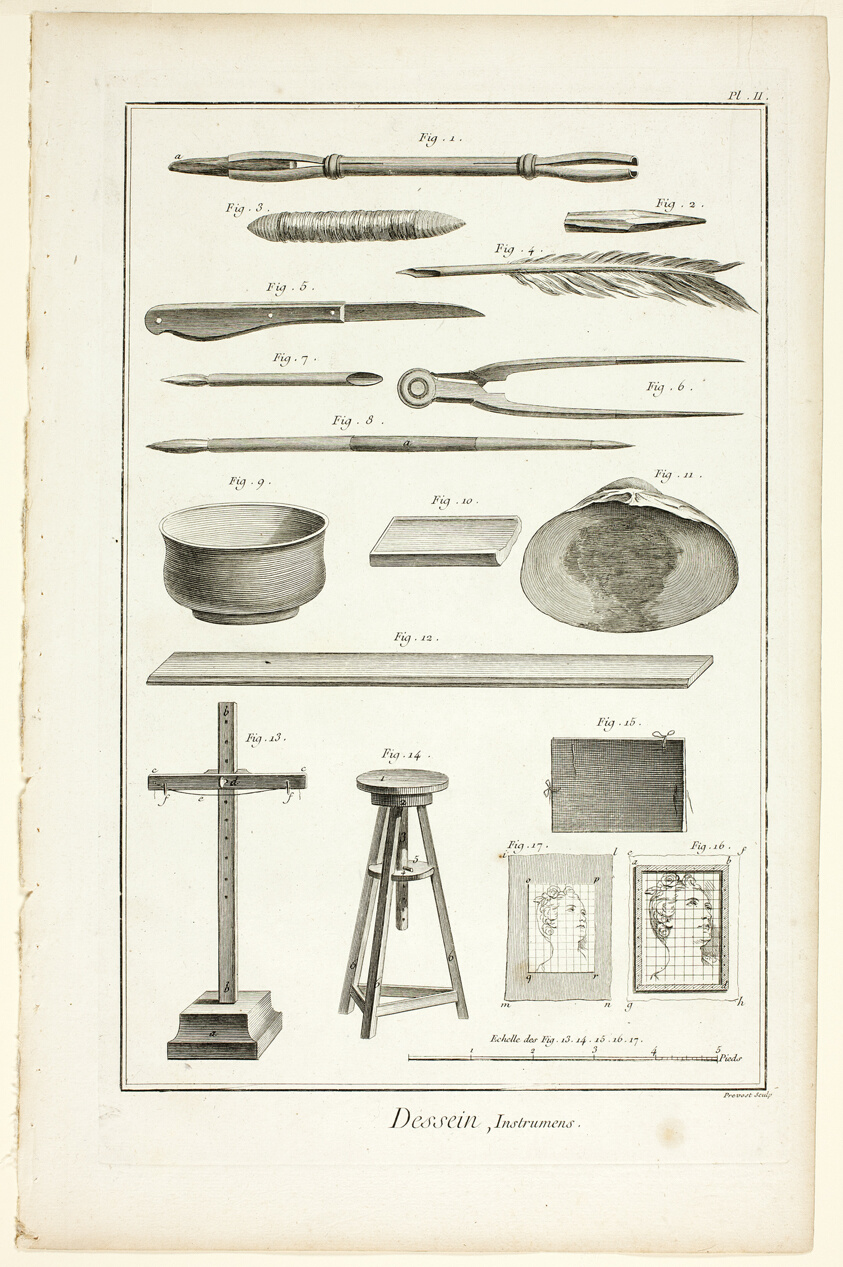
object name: Print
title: Design: Instruments, from Encyclopédie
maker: Benoît-Louis Prévost (French, c. 1735-1809); published by André le Breton (French, 1708-1779), Michel-Antoine David (French, c. 1707-1769), Laurent Durand (French, 1712-1763), and Antoine-Claude Briasson (French, 1700-1775)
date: 1762/77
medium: Engraving on cream laid paper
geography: France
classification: etching; print; prints and drawing